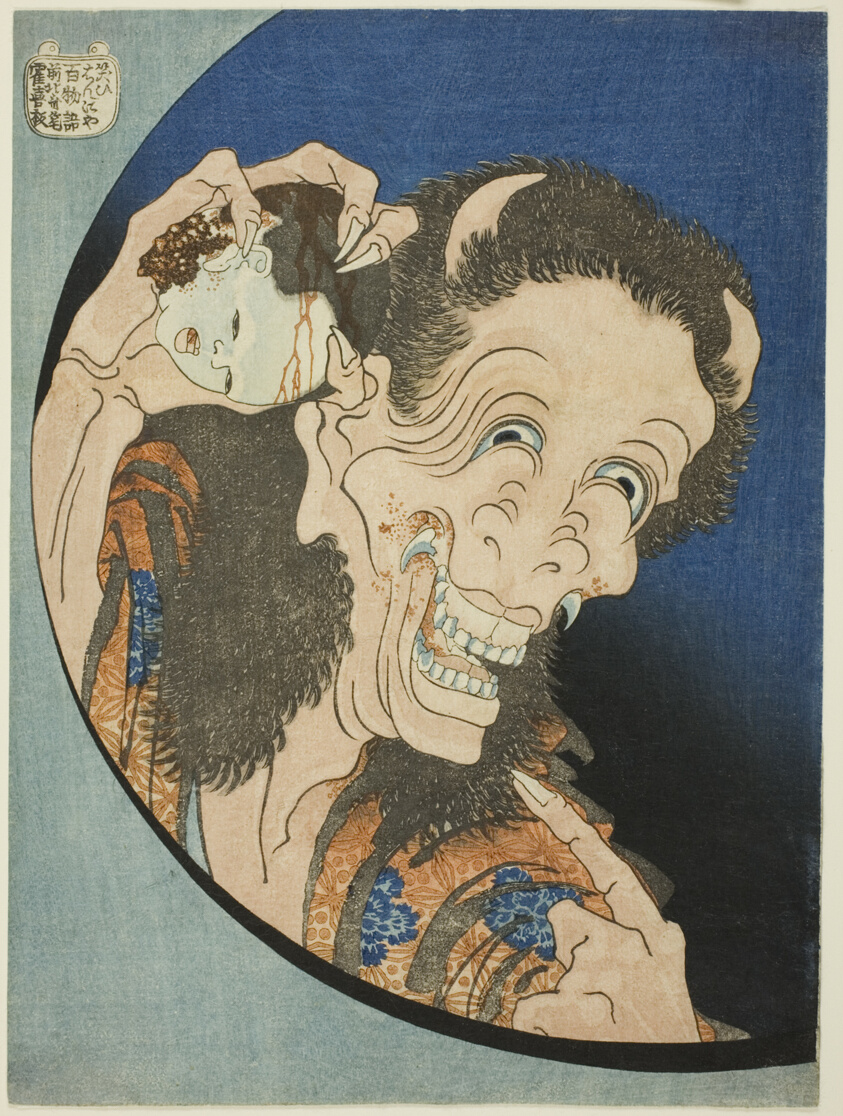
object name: Print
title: The Laughing Demoness (Warai Hannya), from the series "One Hundred Ghost Tales (Hyaku monogatari)"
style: Japanese (culture or style)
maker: Katsushika Hokusai 葛飾 北斎 (Japanese, 1760-1849)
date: 1831-32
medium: Color woodblock print; chuban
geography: Japan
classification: woodblock print; print; asian art